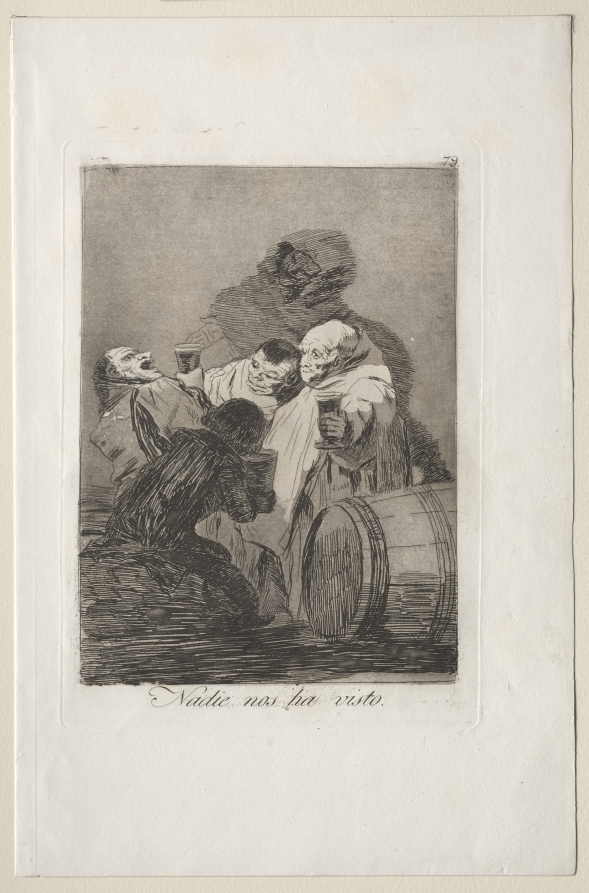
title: No One has Seen Us, Plate 79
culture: Spain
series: Los Caprichos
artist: Francisco de Goya (Spanish, 1746–1828)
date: 1799 (printed c. 1855)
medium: etching and aquatint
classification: Print